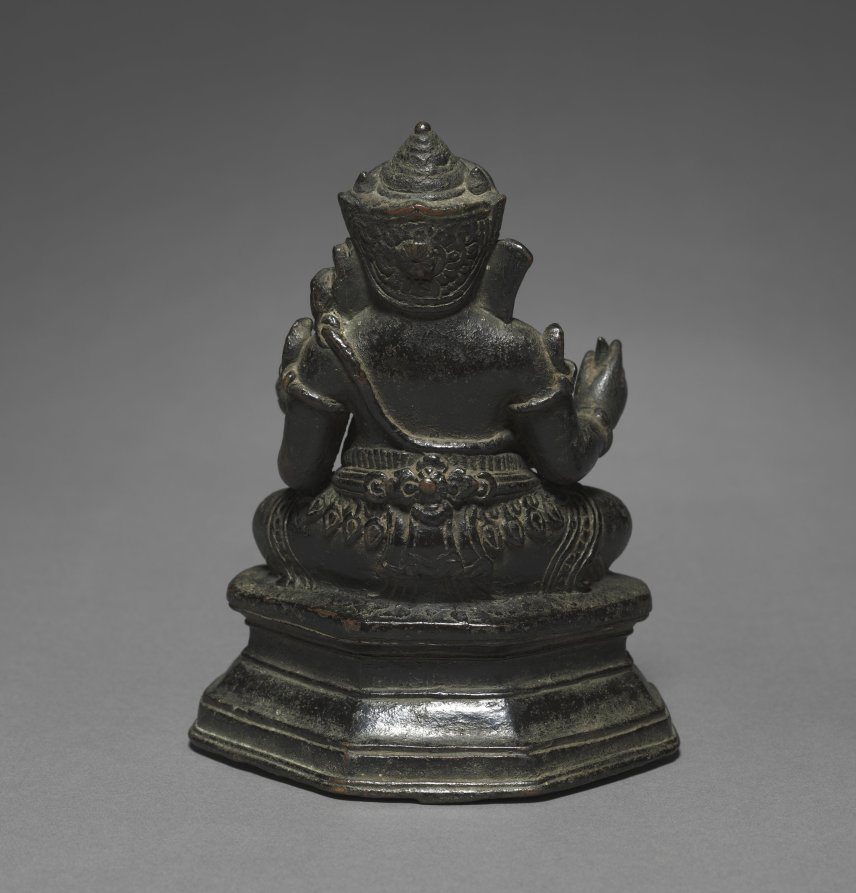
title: Seated Two-armed Ganesa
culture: Cambodia, Angkor Wat Period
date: late 1100s-early 1200s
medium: bronze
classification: Sculpture